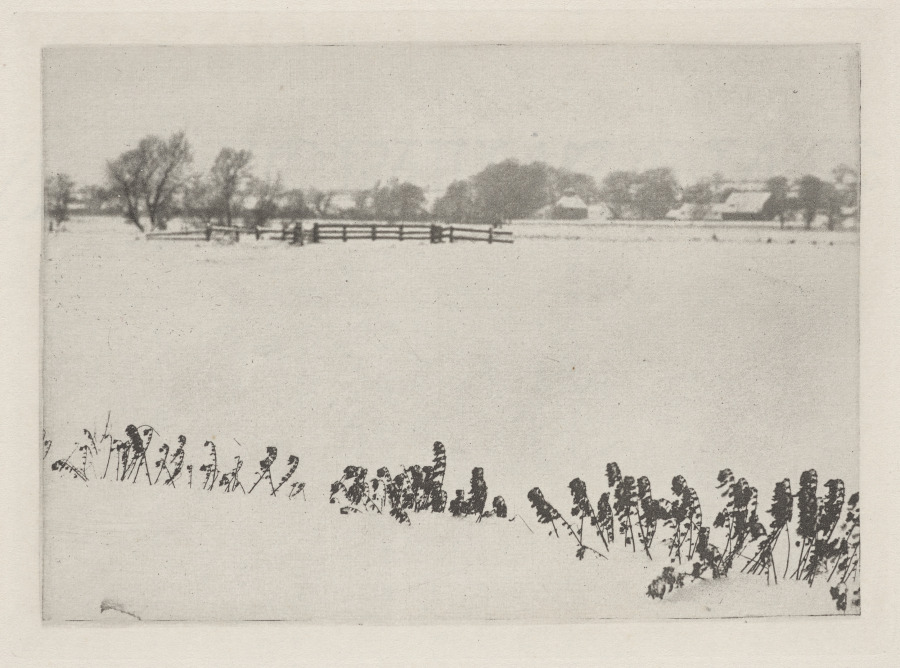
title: Marsh Weeds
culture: England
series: Marsh Leaves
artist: Peter Henry Emerson (British, 1856–1936)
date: before 1891, published 1895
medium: photogravure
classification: Photograph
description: Emerson’s early photographs emphasized naturalism, but his late works such as this one demonstrate influences from Japanese art, French Impressionism, and the painting and graphic art of Whistler, who was a personal acquaintance. This looser, more expressionistic, and emotional late style helped lay the groundwork for Pictorialist photography (for example, see 1980.141), the movement that succeeded in getting photography more widely accepted as a fine art.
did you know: Around the time Emerson made this image, one of his most artistic, he wrote that he no longer believed photography to be an art form.